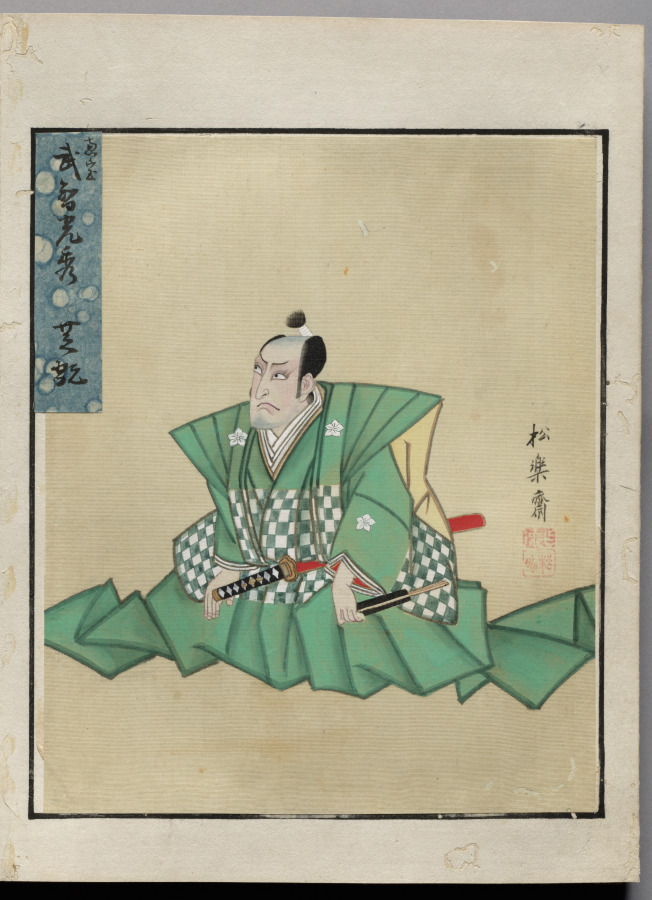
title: Double-Leaf from Album of Actor Portraits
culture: Japan, Edo period (1615–1868)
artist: Shōrakusai (Japanese)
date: c. 1790–1810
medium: double-leaf from an accordion-style album; ink and color on silk (right)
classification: Bound Volume